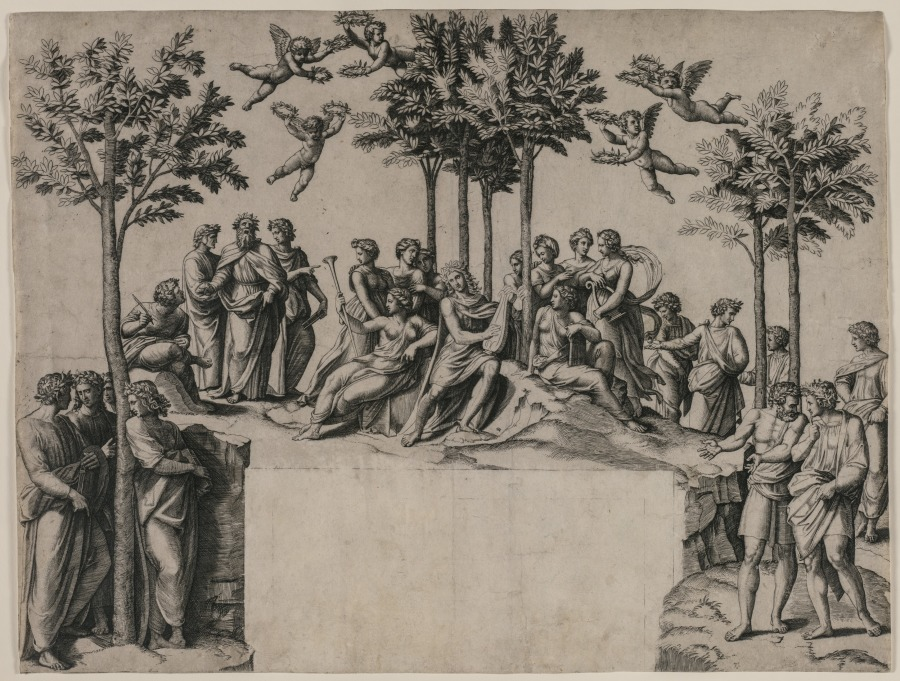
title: Apollo on Parnassus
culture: Italy, 16th century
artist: Marcantonio Raimondi (Italian, 1470/82–1527/34)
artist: after Raphael (Italian, 1483–1520)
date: c. 1517–20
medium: engraving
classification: Print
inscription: verso, lower left, in graphite: TR 13304/3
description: Around 1510, the influential painter Raphael began collaborating with the engraver Raimondi to translate his designs into prints, which allowed his works to reach an international audience. This engraving replicates Raphael’s design for a fresco he painted in the personal apartments of Pope Julius II (1443–1513), showing that devotion to classical ideas reached even the highest levels of religious authority. In addition to Apollo and his muses, Raphael portrayed some of history’s most celebrated poets on the Greek mountain Parnassus. On the left, next to a seated scribe, the ancient Greek poet Homer stands between the Latin poet Virgil (Roman, 70–19 BC) and the late medieval author Dante (Italian, about 1265–1321).